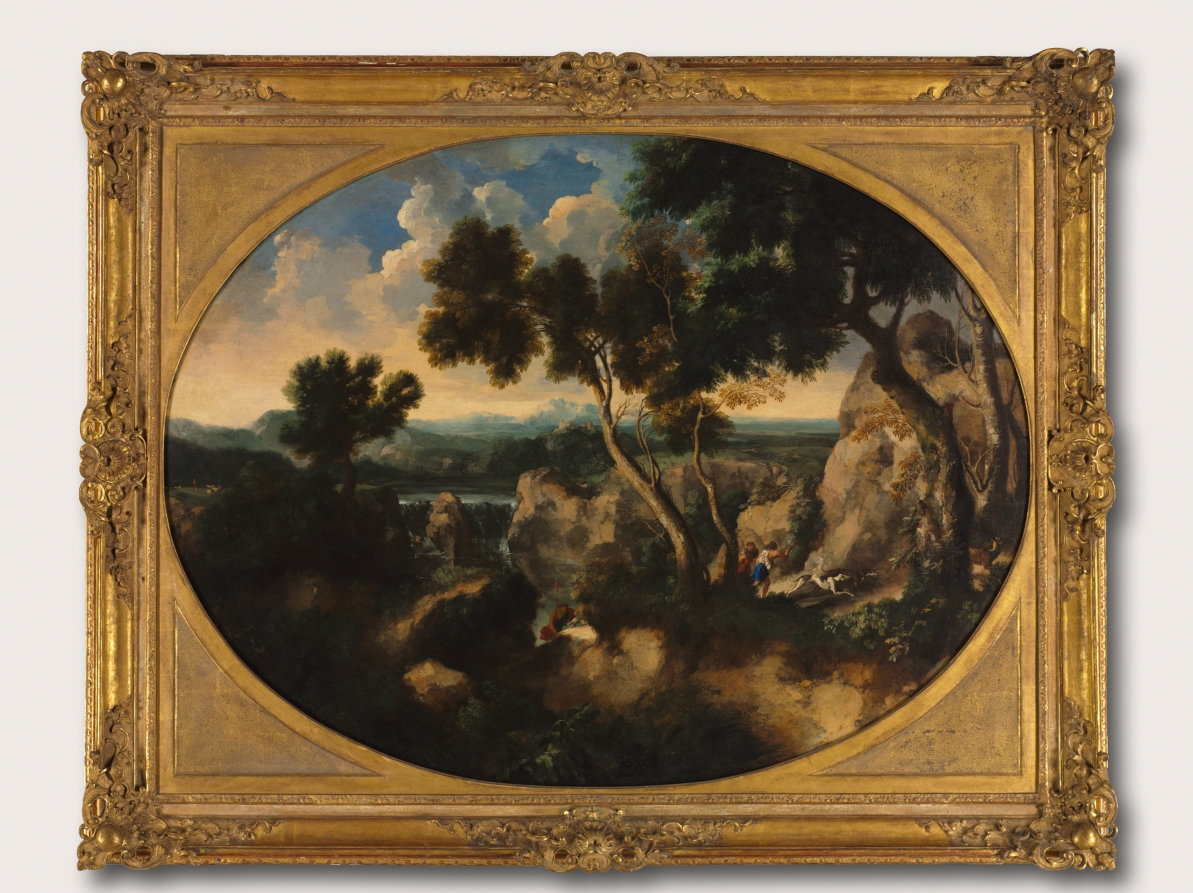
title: Rocky Landscape with Hunters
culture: France, 17th century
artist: Gaspard Dughet (French, 1615–1675)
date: c. 1635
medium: oil on canvas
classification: Painting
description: Dughet spent his whole career in Rome. At the age of fifteen he entered the studio of Nicolas Poussin (1593/94-1665), who married his sister. Dughet concentrated exclusively on landscapes, preferring a rugged type of scenery, widely imitated well into the 18th century.